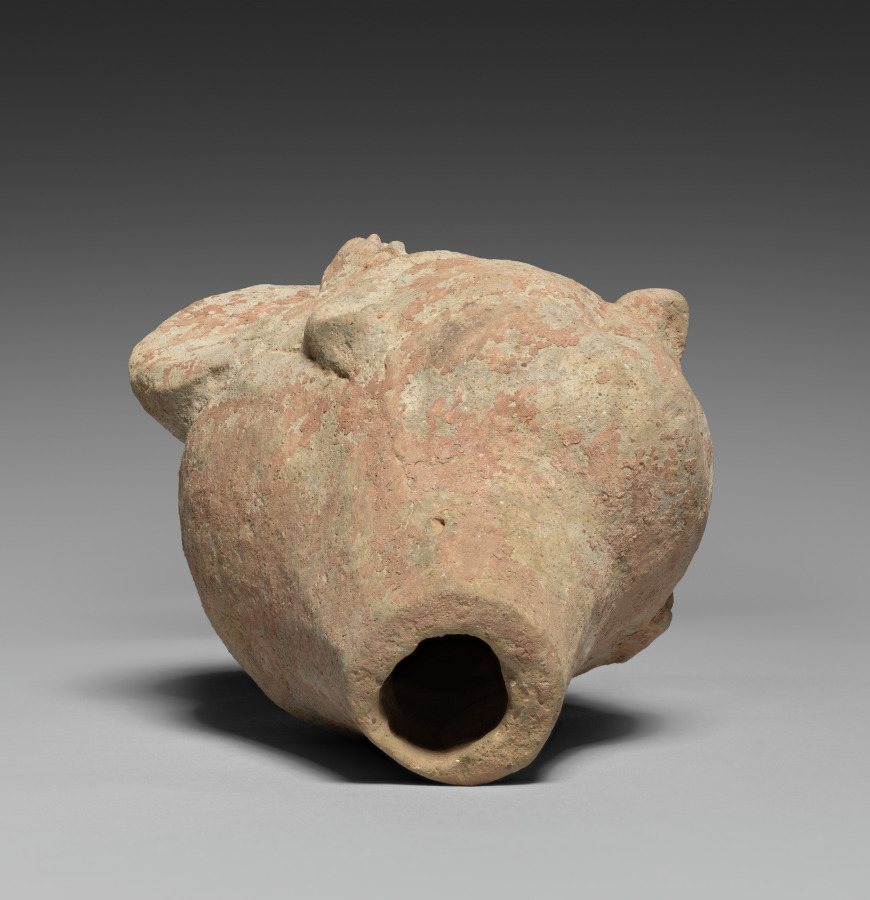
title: Female Figure of a Court Entertainer Dancing (Head)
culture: China, Sichuan province, Eastern Han dynasty (25–220 CE)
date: 100s CE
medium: Pottery with traces of color pigment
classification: Ceramic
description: During the Han era, tombs of the elite were provided with sculpted renditions of their earthly entourage, such as guardians or musicians, to signify their status in the afterlife. The female dancer with elaborate hairdo held by flower ornaments raises one arm holding her wide sleeve with one hand, while the other lifts her robe to reveal what appears to be a drum underneath her garment, her face smiling, all in a gesture of an entertainer.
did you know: The dancer lifts her robe to reveal what appears to be a drum underneath her garment.